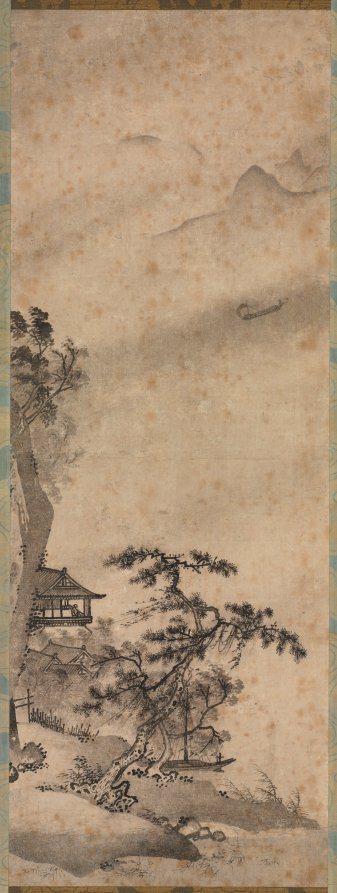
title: Windy Landscape with Sailboat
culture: Japan, Muromachi period (1392–1573)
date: mid-1400s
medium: hanging scroll; ink on paper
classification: Painting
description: Windy Landscape depicts the humble waterside retreat of an official retired from government service. For government officials, retreating from the city to a remote locale was the ideal retirement, though difficult to attain. In this scroll the retiree gazes out over the watery expanse past the sailboat to the mist-covered mountain in the far distance. The artist has achieved this depth of composition through carefully placed brushstrokes and ink washes.